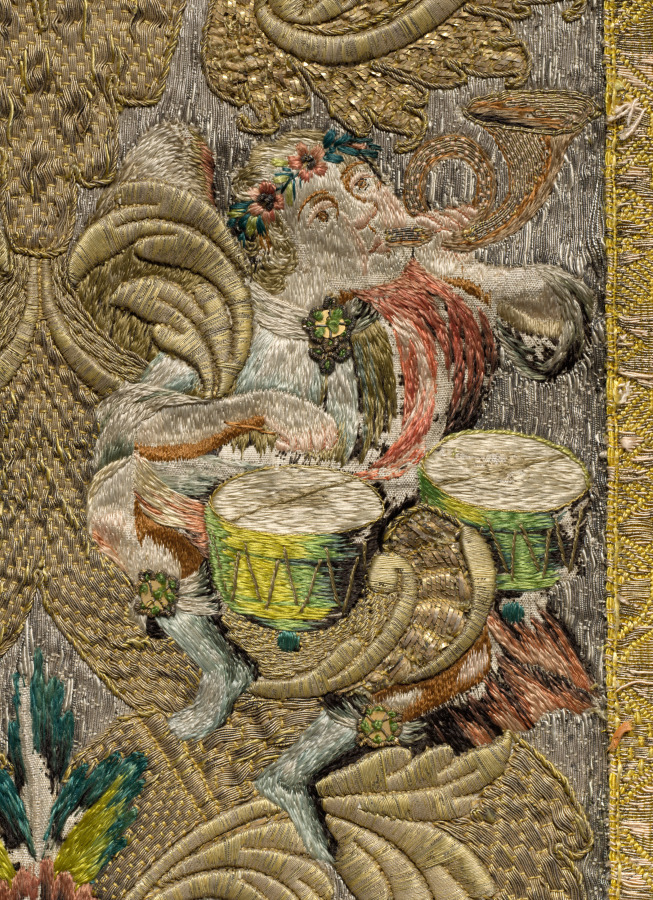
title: Chasuble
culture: Germany, Bavaria, last quarter of 17th century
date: 1675–99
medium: Silk and metallic threads on silk tabby sewn down on a linen tabby ground; embroidery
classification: Embroidery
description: This rare chasuble decorated with angels, musicians, pomegranates, and flowers represents Sacred and Profane Love. This is indicated by two figures—a clear-sighted figure embracing a blindfolded figure—standing on a globe in the upper center and also by the musicians. The angels play soft-sounding instruments (harpsichords, harps, viole da barccio, and flutes) while earthy figures play loud instruments (tambours and hunting horns). The chasuble was most likely part of a liturgical set commissioned for a wedding. This entire chasuble is embroidered with silk and metal thread laid over linen and stitched in place. The exceptionally fine workmanship, lavish use of gold and silver, and brilliant silk thread create this sumptuous vestment.